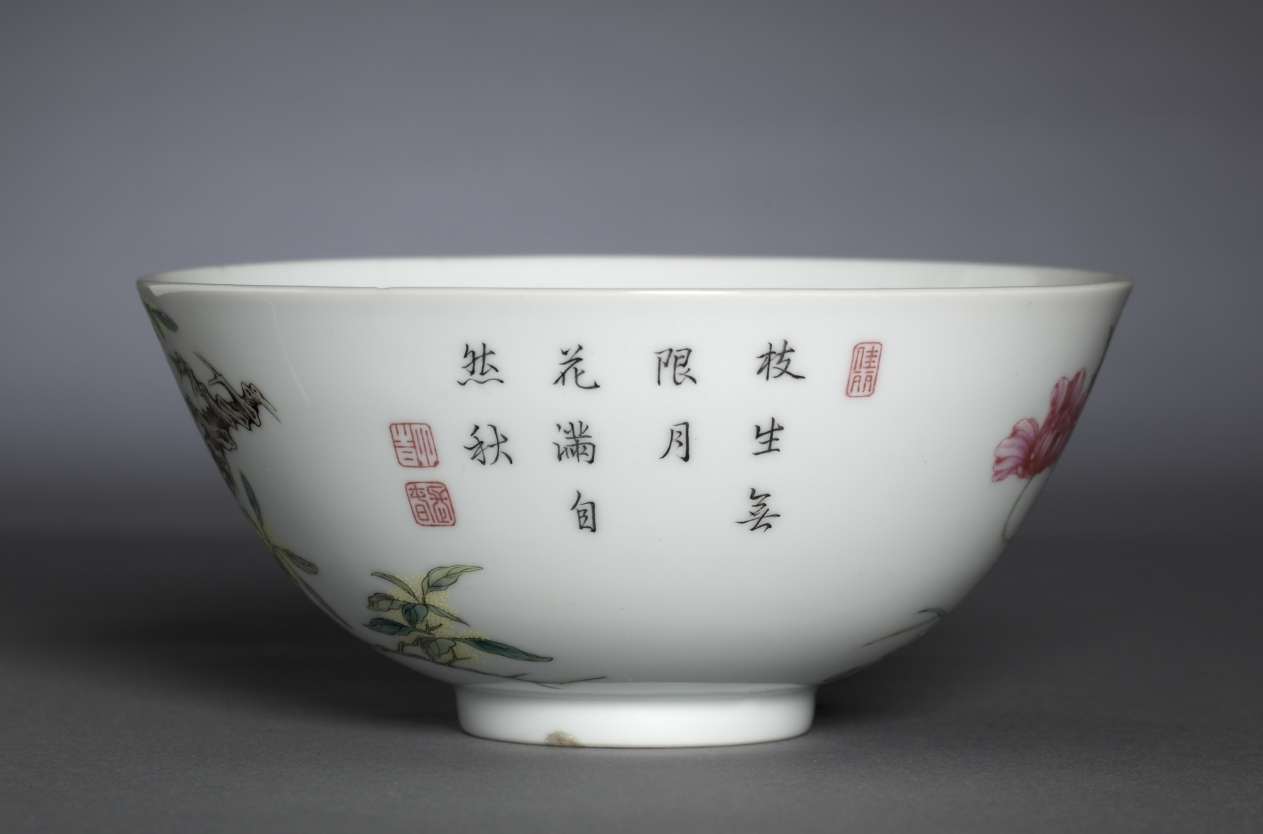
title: Bowl with Poppies, Tree Peony, and Flowering Mimosa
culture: China, Jiangxi province, Jingdezhen, Qing dynasty (1644-1911), Yongzheng mark and reign (1723-1735)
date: 1723–35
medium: porcelain with overglaze enamel decoration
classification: Ceramic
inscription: 大清雍正年制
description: Developments in enamel technology led to new possibilities in polychrome decoration. Pinks appeared, lending their name to the new palette of overglaze colors (famille rose), and the addition of opaque white allowed painters to vary the value of pigments, enhancing the painterly quality of porcelain decoration. As on painted scrolls and album leaves, the image is accompanied with a poem, in this case: "Branches come alive in the moonlight; Blossoms fill the autumn realms."